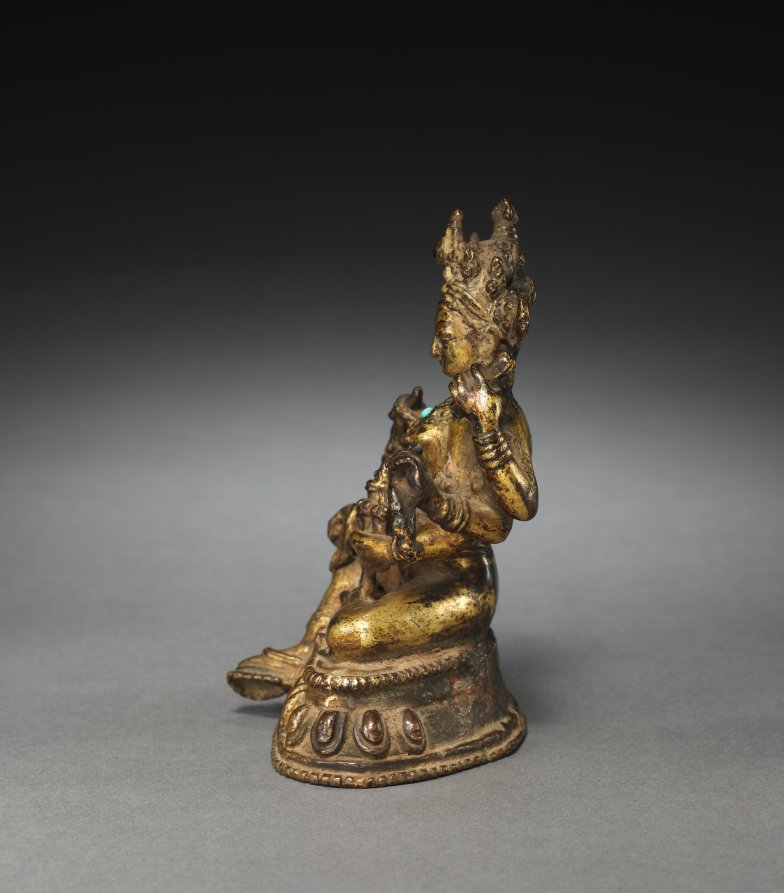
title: Seated Vasudhara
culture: Nepal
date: c. 1300s(?)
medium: brass or bronze; turquoise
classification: Sculpture